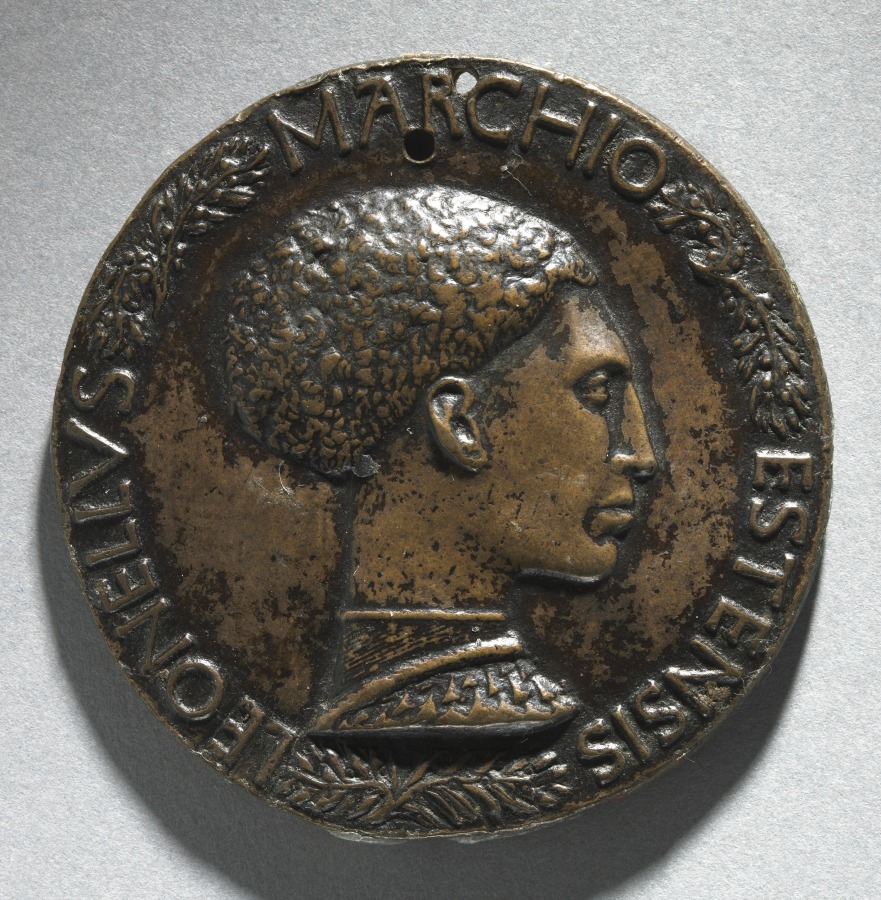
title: Portrait of Leonello D'Este, Marquess of Ferrara (obverse and reverse)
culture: Italy, 15th century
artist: Pisanello (Italian, Ferrara, c. 1395–1455)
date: c. 1440–1444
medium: bronze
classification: Sculpture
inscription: obverse: LEONELLVS MARCHIO ESTENSIS, separated by olive branches.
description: Renaissance medals usually show a person on the front and a symbolic element on the back, creating an overall statement about the individual. Lionello d'Este was one of the most sophisticated patrons in Renaissance Italy, and he was one of the first figures to sponsor the tradition of medals in the 1400s.